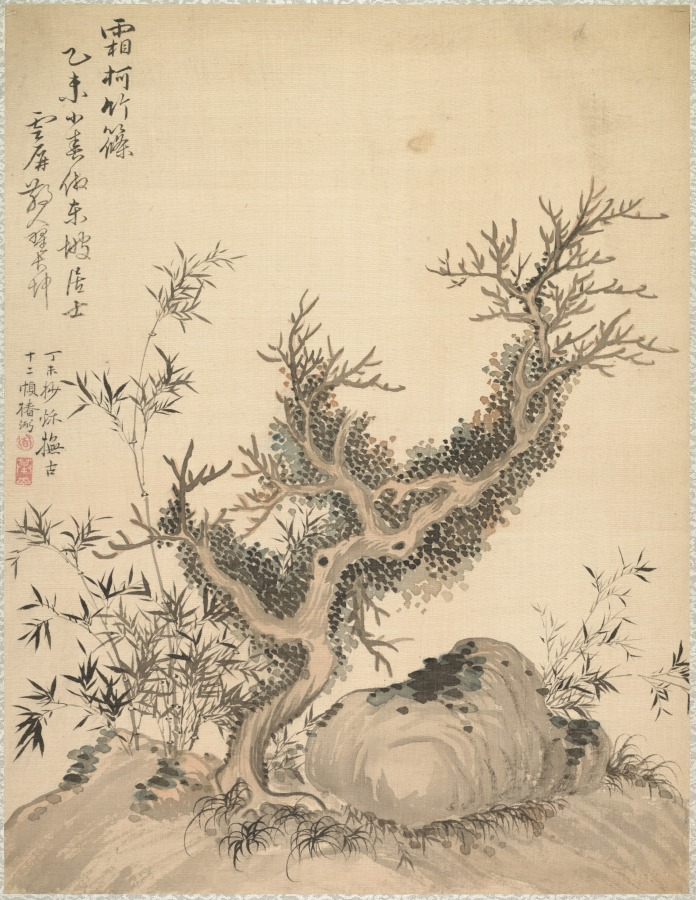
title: Frosted Branches and Dwarf Bamboo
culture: Japan, Edo period (1615–1868)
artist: Tsubaki Chinzan (Japanese, 1801–1854)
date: 1847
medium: album leaf; ink and color on silk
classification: Portfolio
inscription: Tsubaki Chinzan inscribed each leaf with the same inscription that Zhai Dakun wrote on his album leaves.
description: As the title of this album suggests, Tsubaki Chinzan painted each of the landscapes included in the album after interpretations of the styles of old masters by Chinese painter Zhai Dakun (翟大坤, active 1730–1804). In addition to the painted compositions, he also copied the inscriptions on Zhai Dakun's paintings.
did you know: This composition was inspired by Zhai Dakun's painting, CMA 1986.49.12.